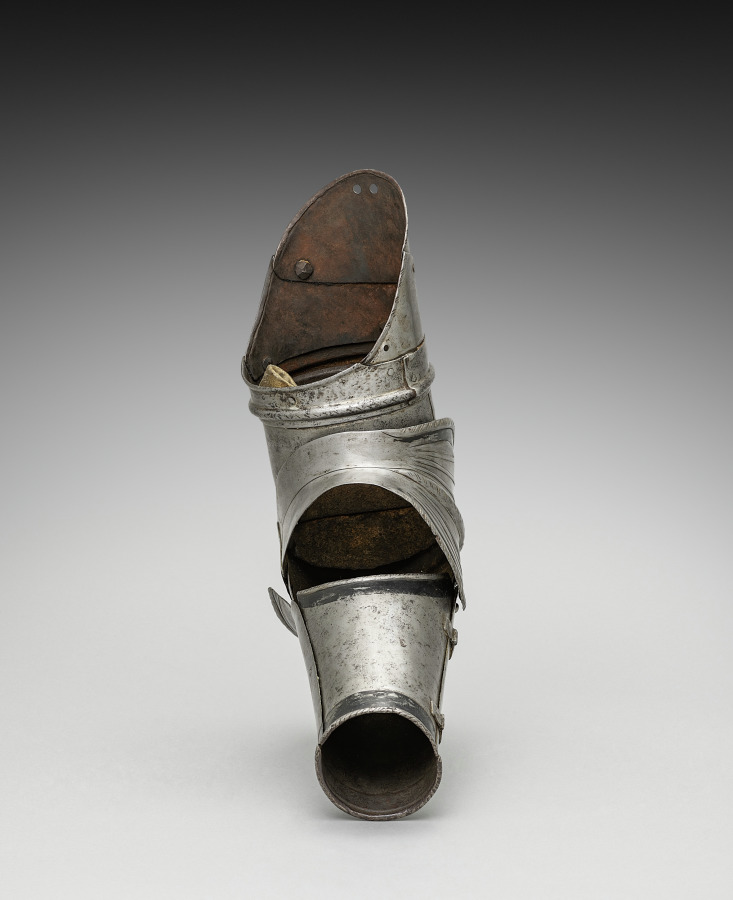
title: Left Vambrace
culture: Germany, 19th century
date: 1801–1900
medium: steel with black paint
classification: Arms and Armor